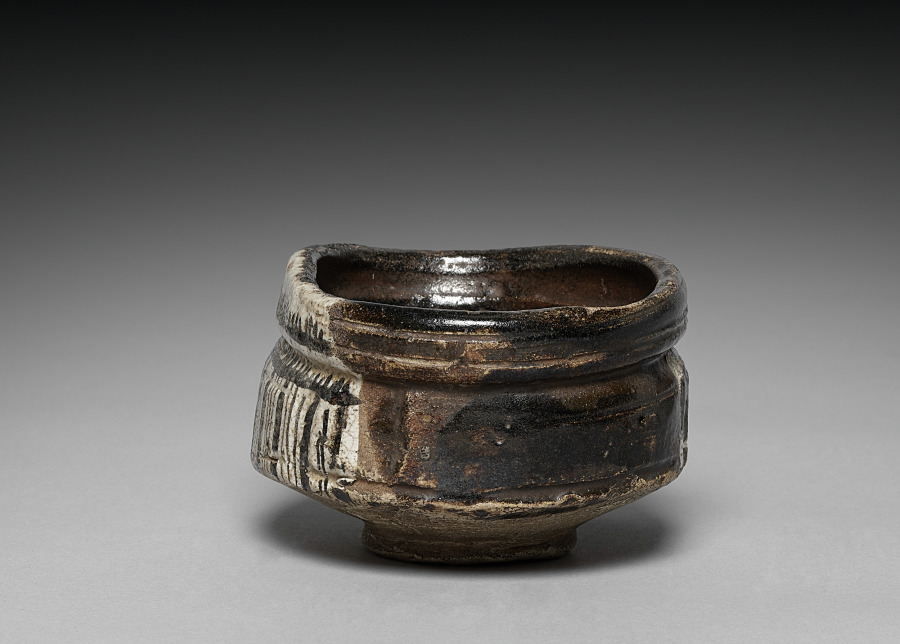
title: Clog-shaped Teabowl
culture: Japan, Momoyama period (1573–1615)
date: early 1600s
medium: Glazed stoneware (Mino ware, Oribe type)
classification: Ceramic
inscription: Mark: cross on base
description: Tea gatherings are fundamental to Japanese culture. Teabowls like this one are the most important objects used in tea practice. Its oblong shape and bold abstract designs are the signature style of the time period in which it was produced. That style is called Oribe, named for the tea master who championed the aesthetic.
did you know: Oribe is a government position. It means the person in charge of textiles.